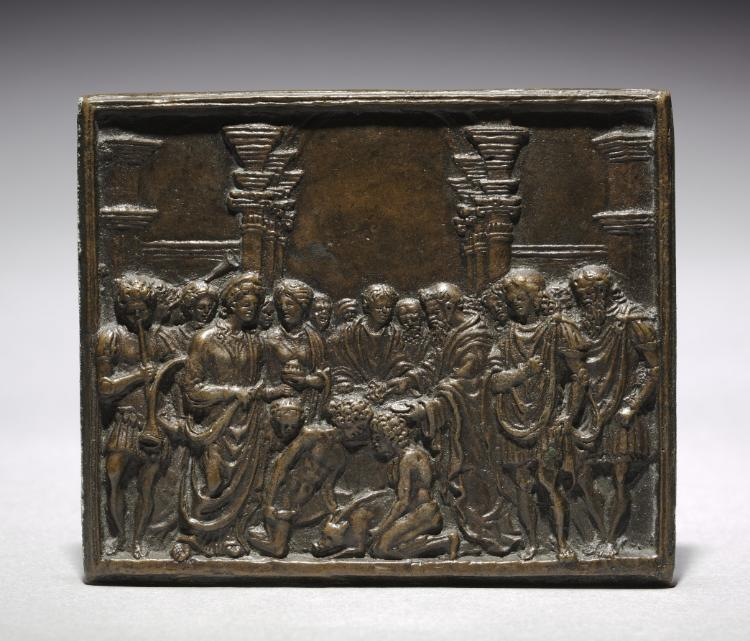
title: The Sacrifice of a Swine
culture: Italy, 16th century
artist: Andrea Riccio (Italian, c. 1470–1532)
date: c. 1520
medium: bronze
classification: Sculpture